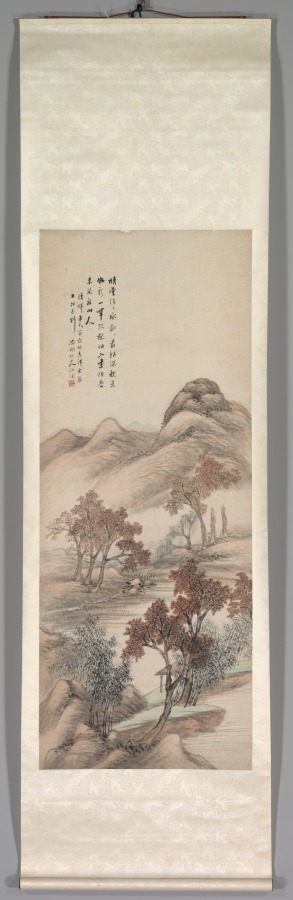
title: Autumn Landscape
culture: China, Jiaxing, Qing dynasty (1644-1911)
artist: Yang Borun (Chinese, 1837–1911)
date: late 1800s–1911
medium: hanging scroll, ink and color on paper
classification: Painting